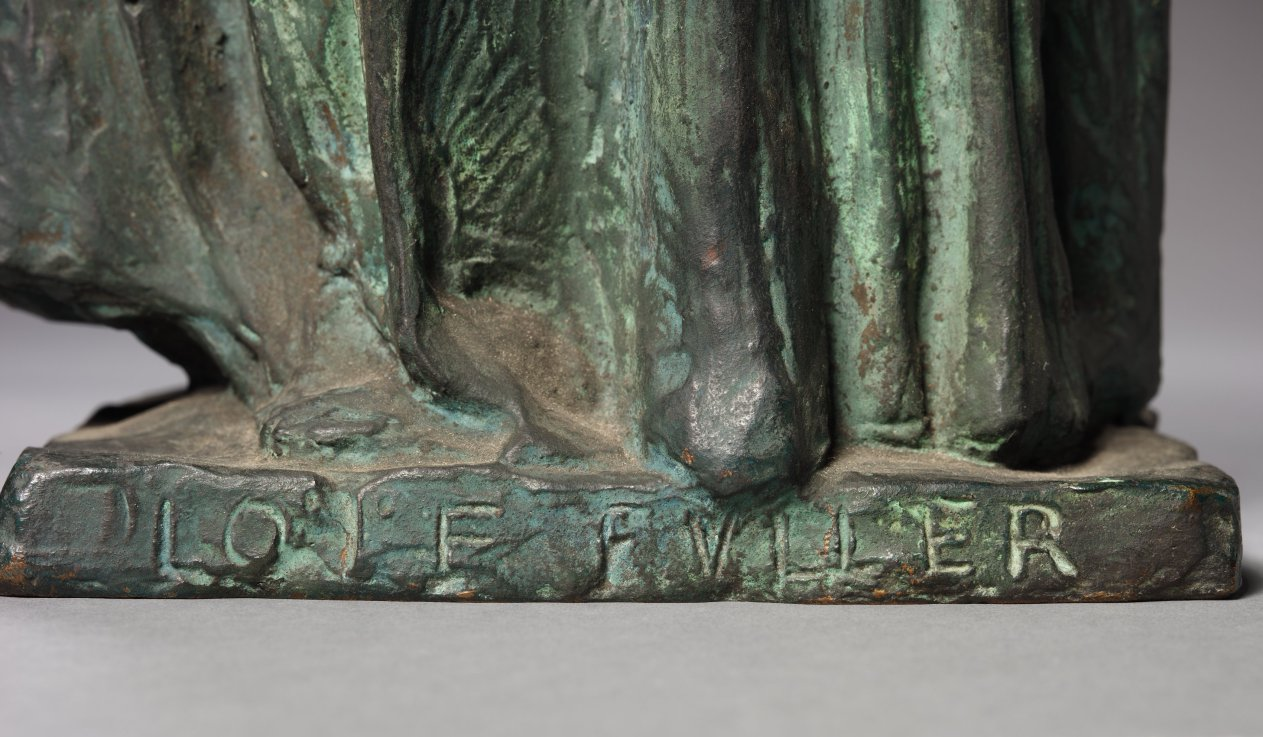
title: Loïe Fuller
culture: France, 19th-20th century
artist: Pierre Roche (French, 1855–1922)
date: c. 1900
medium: bronze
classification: Sculpture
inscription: Inscribed on the face of the base: "Loïe Fuller" and at the right, signature of the artist